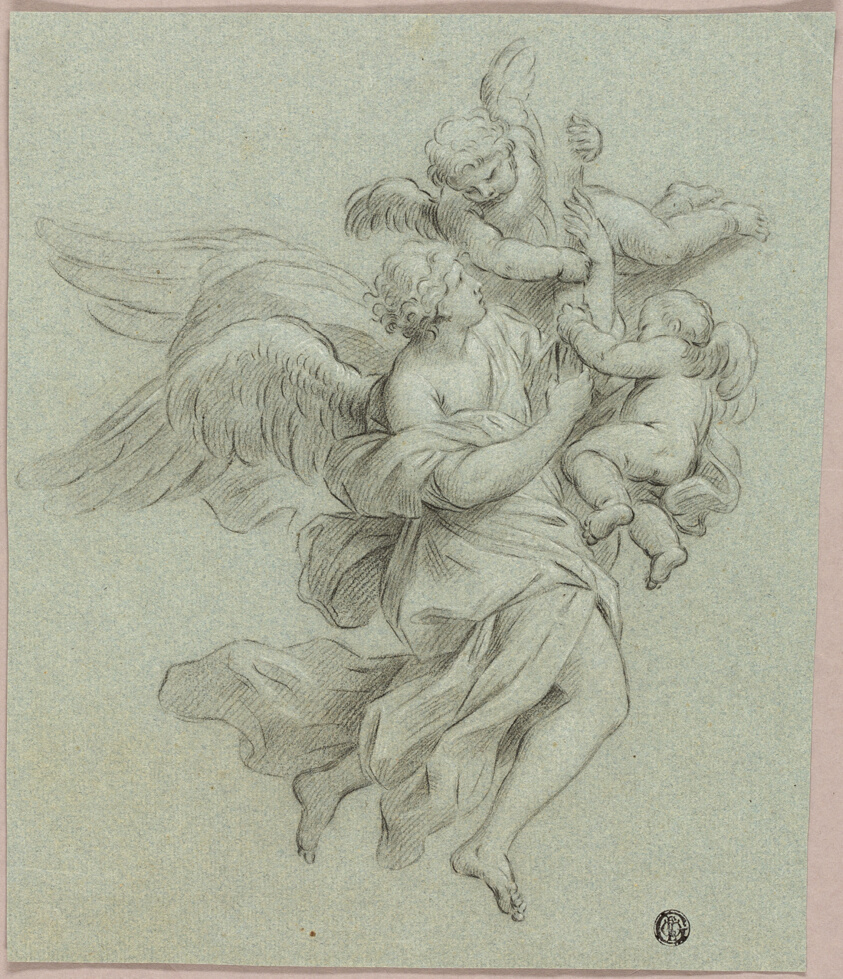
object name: Drawing and Watercolor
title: Angel with Putti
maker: Attributed to Sebastiano Conca; Italian, 1680-1764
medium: Black chalk, heightened with white chalk, on blue laid paper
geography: Italy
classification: chalk; paper; drawings (visual works); prints and drawing